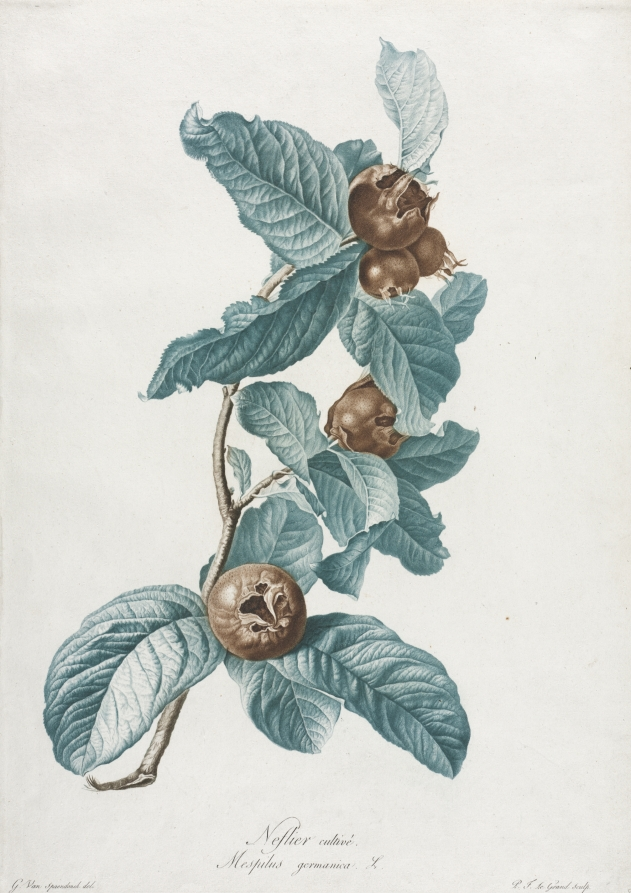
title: Cultivated Medlar (Mespilus germanica)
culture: Netherlands, late 18th-early 19th Century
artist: Gerard van Spaendonck (Dutch, 1746–1822)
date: c. 1800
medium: stipple and roulette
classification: Print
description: The brown and blue-green inks were printed à la poupée. Instead of making a plate for each color, a single plate is selectively inked in different colors using stumps of rags, known as dolls (poupée in French), so that the complete design is printed at one time. Since this process is laborious, the plate was most often colored by hand with watercolor, like the right-hand impression. The printed color, however, creates a more beautiful effect, because all of the subtleties of the shading are evident. In comparison, the watercolor camouflages some of the finest detail.